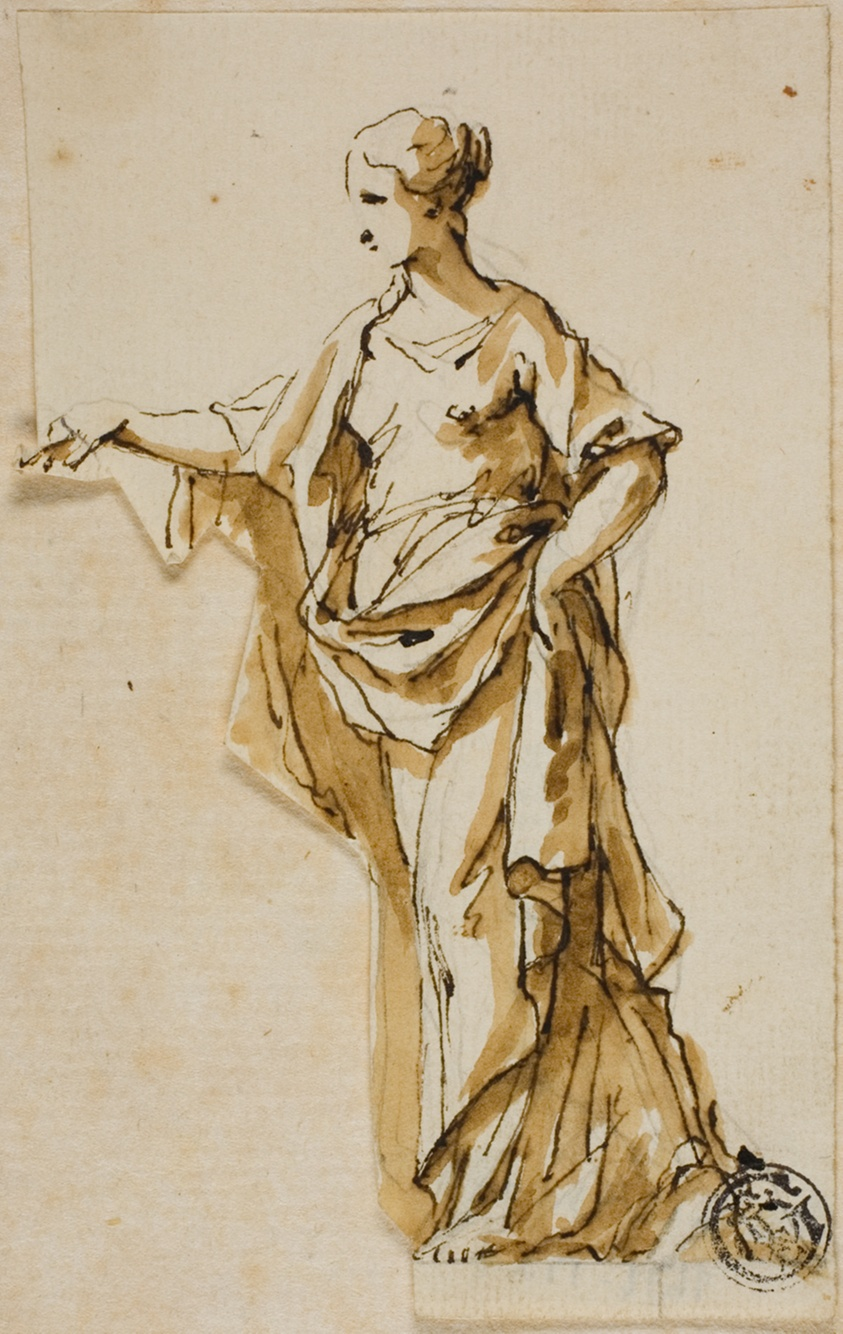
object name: Drawing and Watercolor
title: Standing Female Figure with Right Hand Raised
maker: John Michael Rysbrack (Flemish, 1693-1770); or James Thornhill (English, 1675-1734)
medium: Pen and brown ink, with brush and brown wash, over graphite, on ivory laid paper, tipped onto ivory laid paper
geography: Flanders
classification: pen and ink drawings; drawings (visual works); prints and drawing